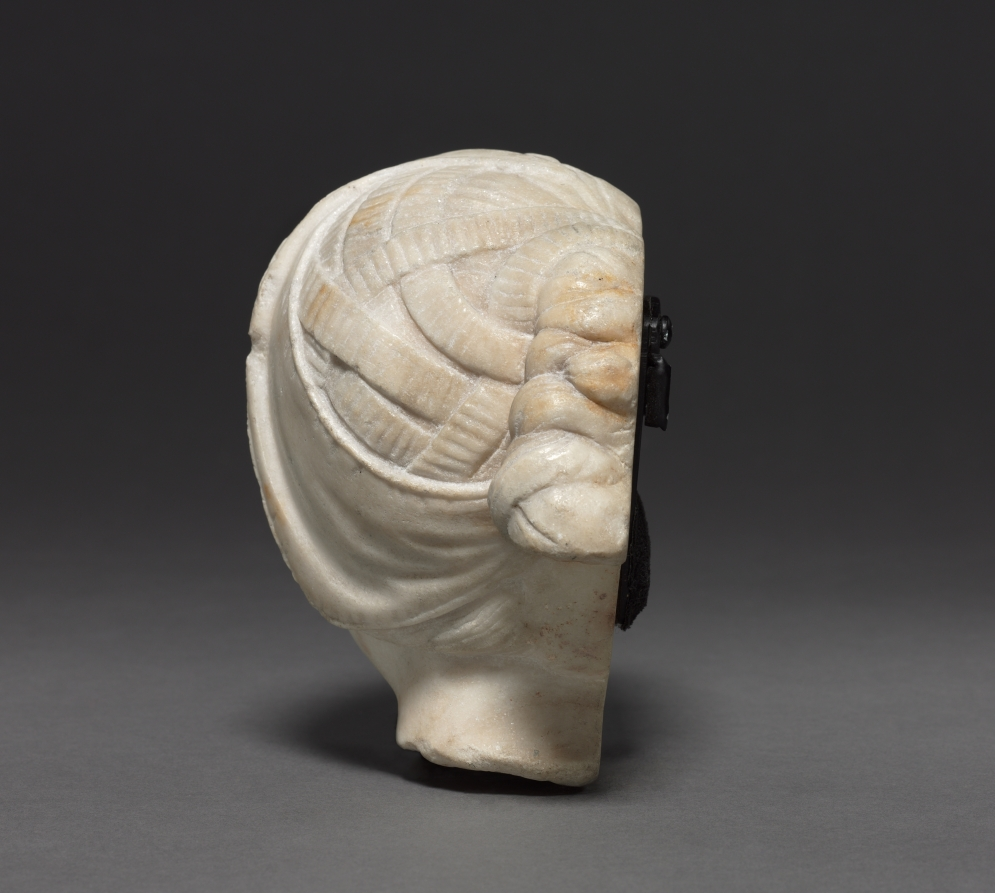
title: Head of a Woman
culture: France, 15th century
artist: circle of Michel Colombe (French, c. 1430–c. 1513)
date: c. 1500–1525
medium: marble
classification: Sculpture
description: The original context and function of these two marble heads are unknown. They are presumed to have been part of a relief sculpture from a château, perhaps in the Loire region, or else from a tomb sculpture. Their style is reminiscent of sculptures produced by Michel Colombe, a prominent sculptor active in the Loire Valley in the service of aristocratic and royal patrons, and may have been carved by a close follower or member of his workshop.